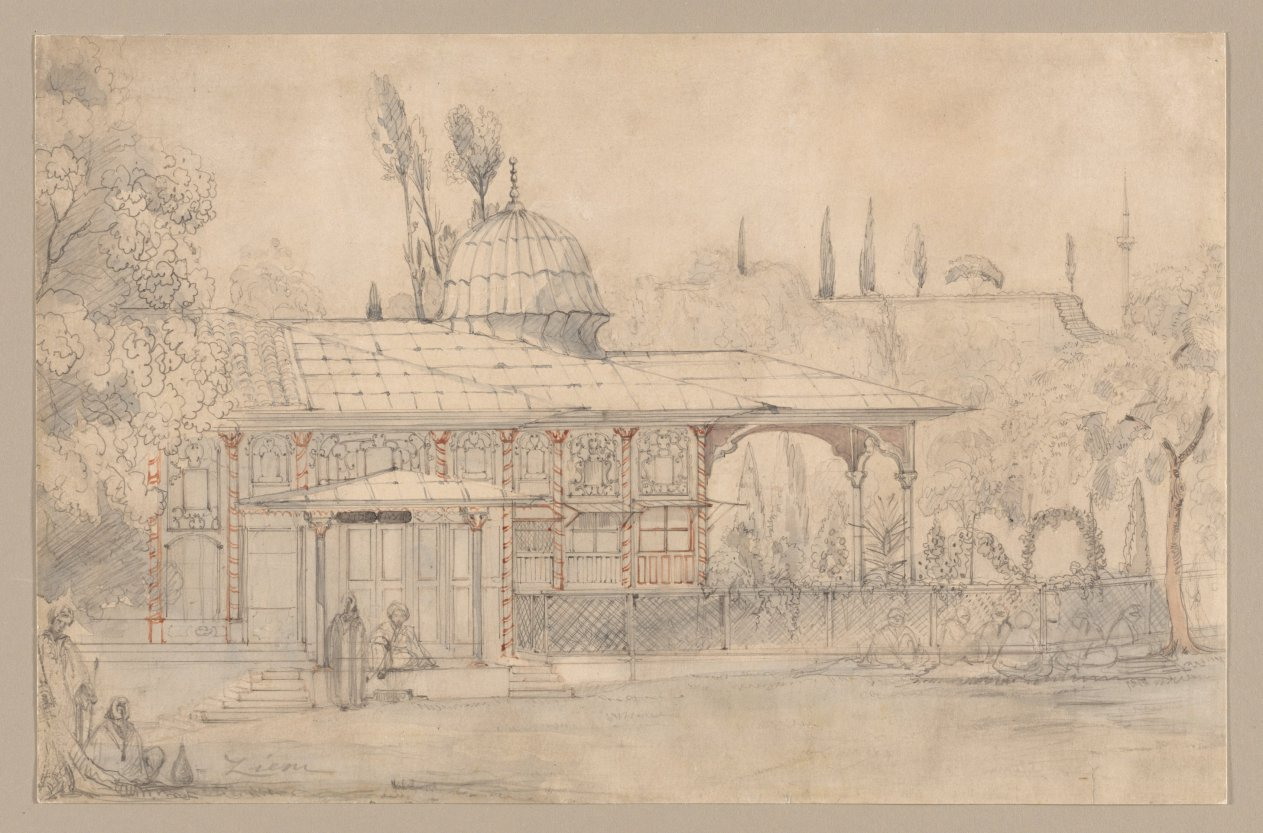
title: Pavilion Near a Mosque (recto)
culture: France, 19th century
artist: Félix Ziem (French, 1821–1911)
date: 1800s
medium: graphite and gray, blue, orange and red wash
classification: Drawing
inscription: signed, lower left, in graphite: Ziem